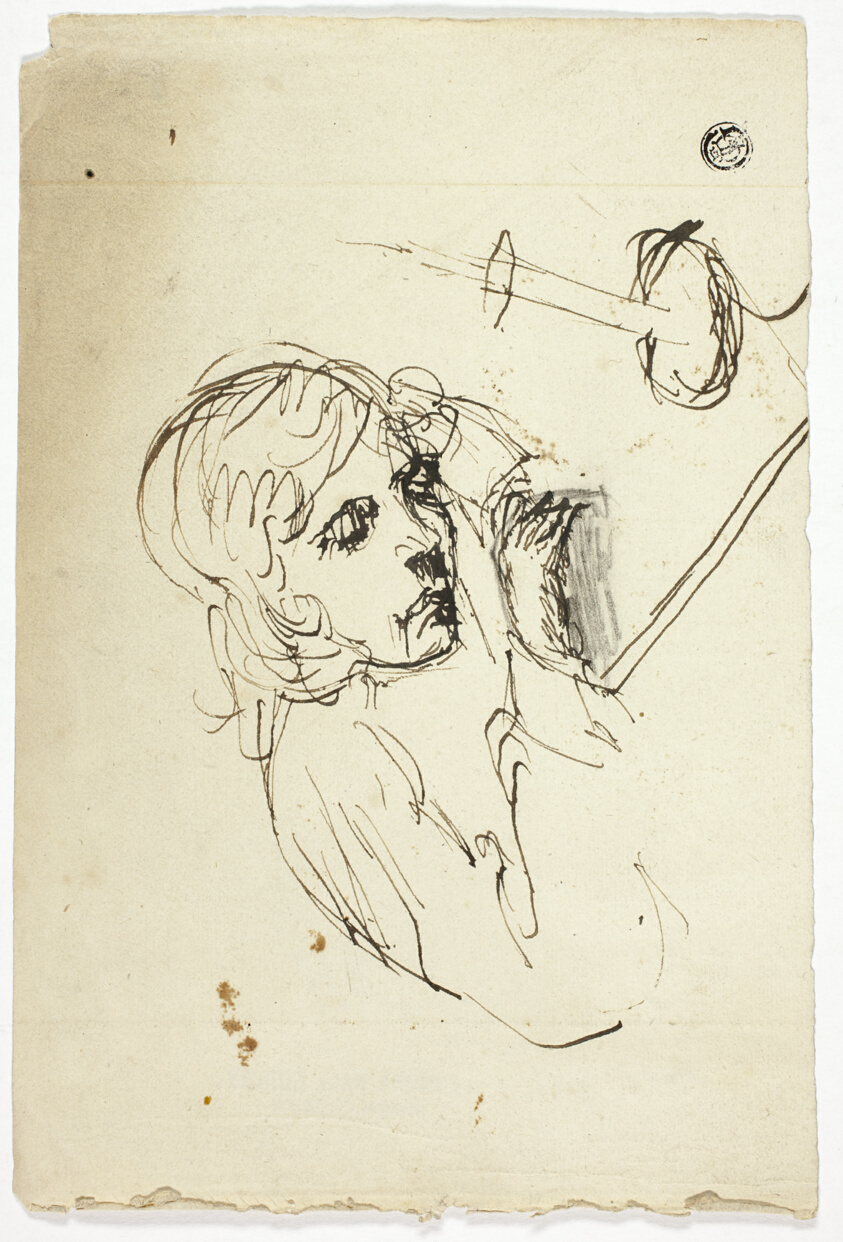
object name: Drawing and Watercolor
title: Boy Asleep by Candle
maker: Unknown Artist; Italian, 18th century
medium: Pen and brown ink, with touches of black chalk, on ivory laid paper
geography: Italy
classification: pen and ink drawings; drawings (visual works); prints and drawing